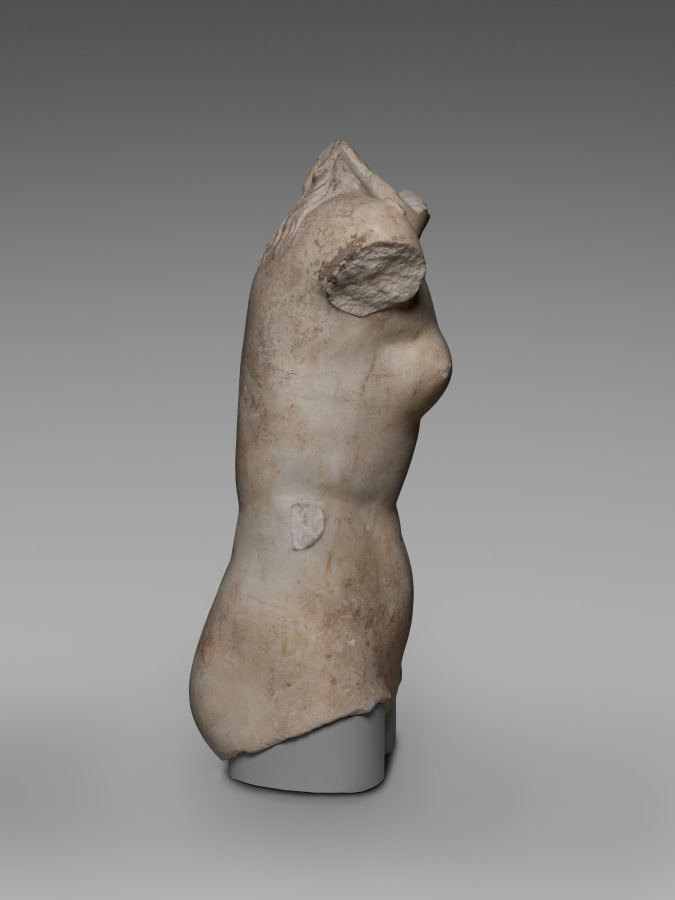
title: Aphrodite Torso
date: 200–1 BCE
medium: Thasian marble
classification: Sculpture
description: This torso can be identified through its nudity and pose as the Greek goddess of love, Aphrodite. Based on the now-lost Aphrodite of Knidos, a revolutionary marble sculpture created by Praxiteles of Athens in the mid-300s BCE, this sculpture belongs to a popular Greek and Roman type showing the goddess at her bath. With hips slightly shifted, she stood in a relaxed posture with most of her weight on one leg, probably with one hand modestly covering her pubic region and the other shielding her breasts or holding drapery. Alternatively, one or both hands may have tended to her wet hair, some of which falls over her neck and upper back.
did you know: This torso is based on the Aphrodite of Knidos, a Greek original by the master sculptor Praxiteles.